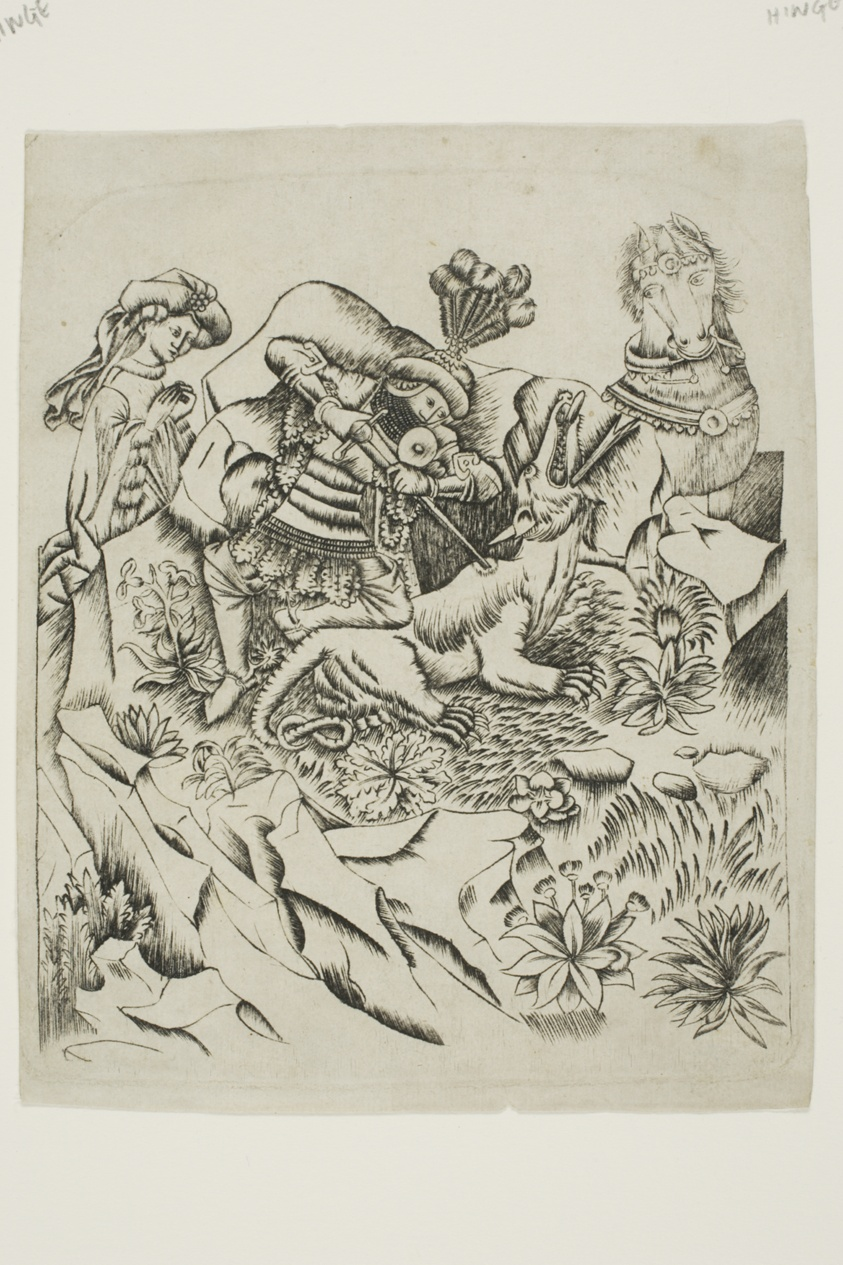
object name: Print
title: Saint George and the Dragon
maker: Master of the Nuremberg Passion (German, active before 1450); after The Master of the Playing Cards (German, active c.1425-1450)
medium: Engraving on ivory laid paper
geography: Germany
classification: engraving; print; prints and drawing